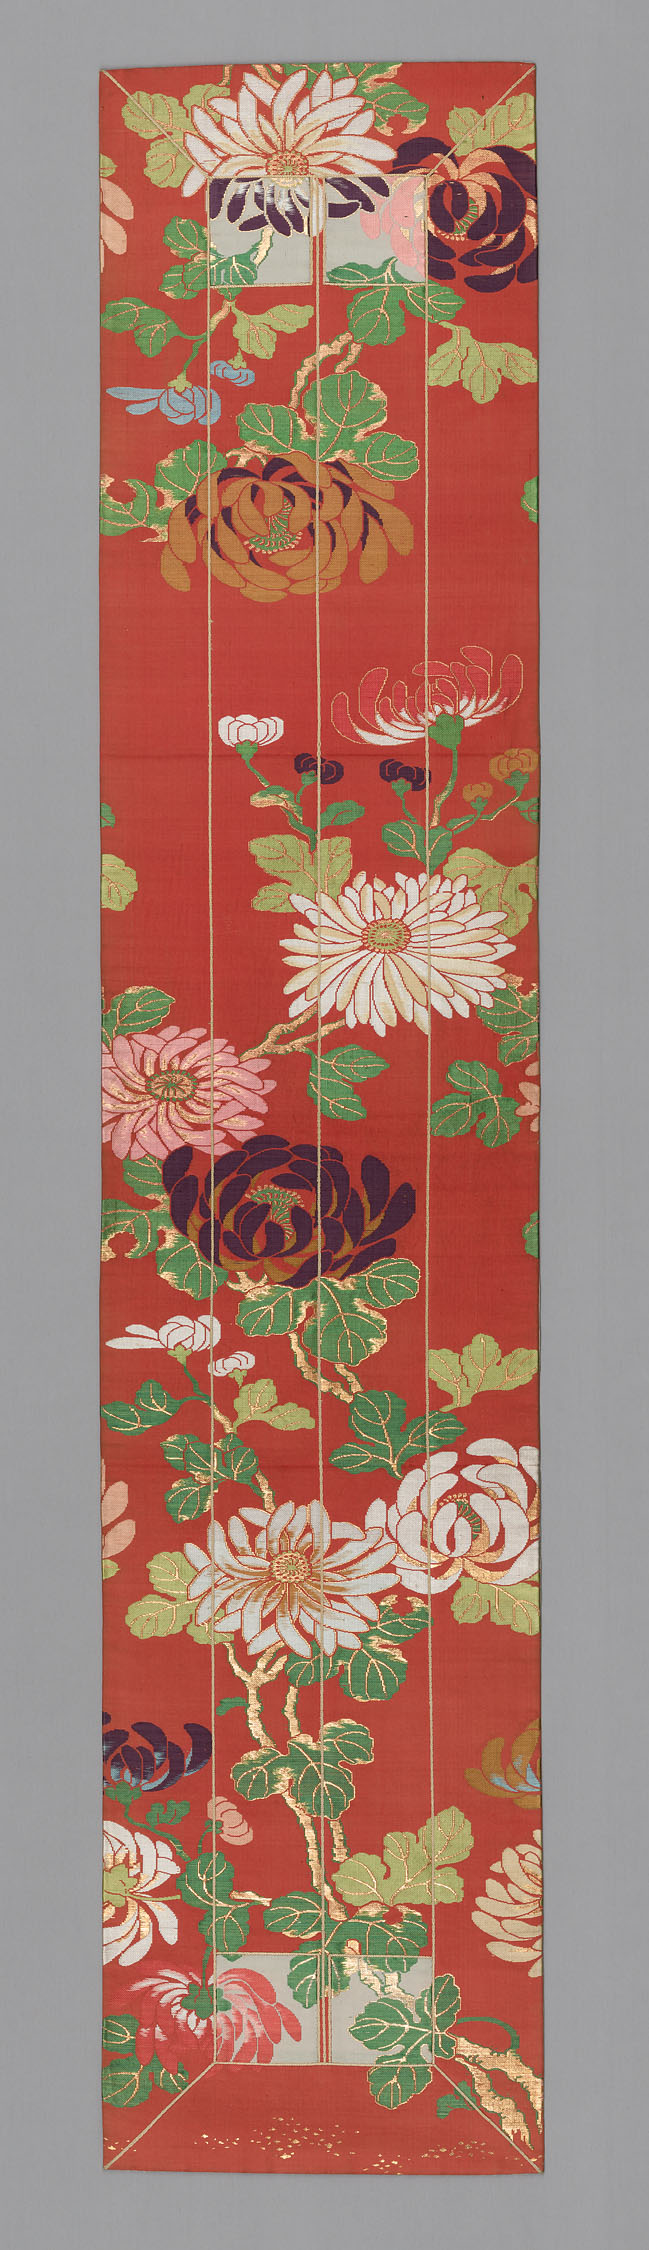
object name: Textile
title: Ôhi (Stole)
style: meiji, Japanism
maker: Japan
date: Meiji period (1868–1912), 1875/1900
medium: Silk and gold-leaf-over-lacquered-paper strip, warp-float faced 1:2 'Z' twill interlacings of secondary binding warps and secondary patterning wefts; lined with silk, 5:1 satin damask; silk cords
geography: Japan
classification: textile; weaving